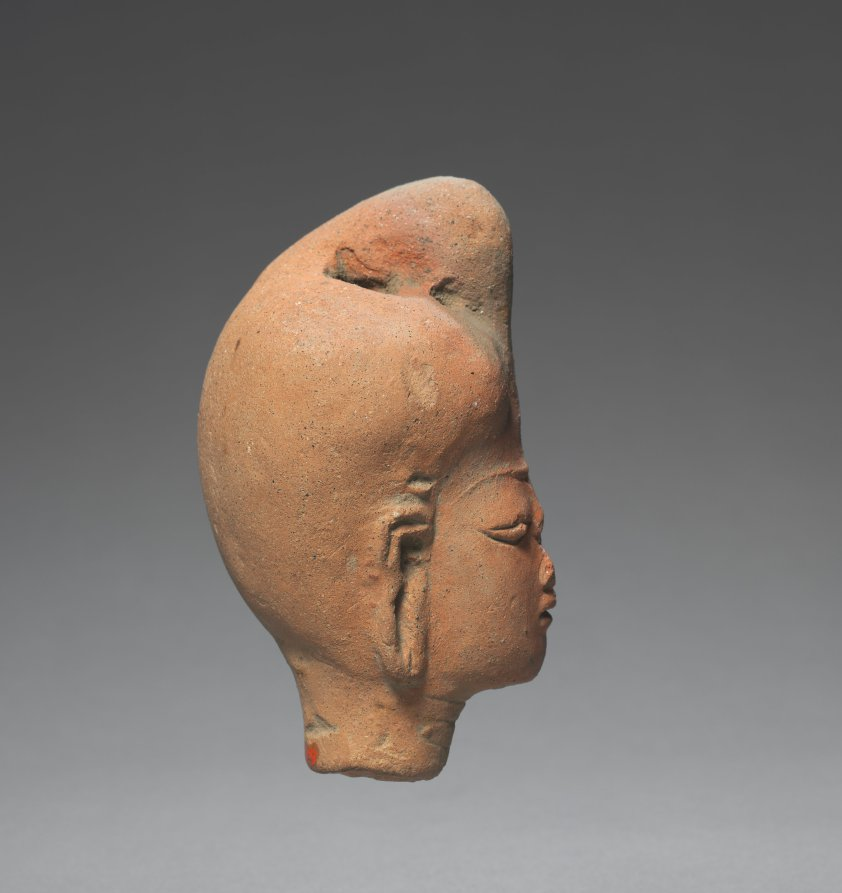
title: Head of a Woman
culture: Java, Majapahit period (1294–1478)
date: 1300s–1400s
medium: terracotta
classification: Sculpture